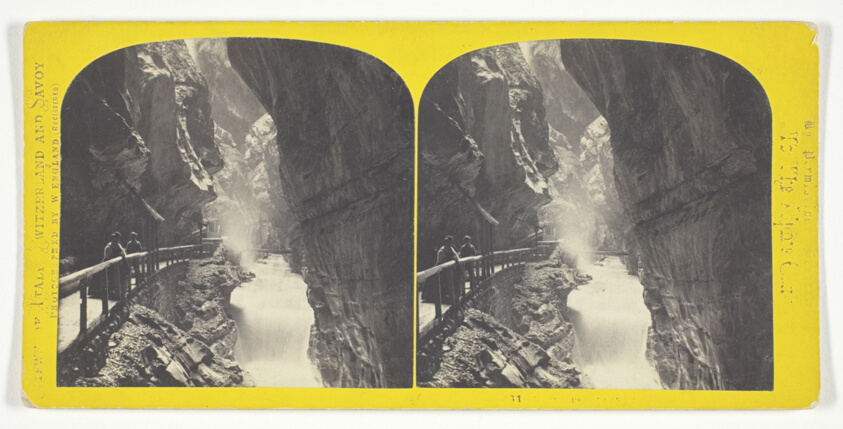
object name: Photograph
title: Unknown, from the series "Views of Switzerland"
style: 19th century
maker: William England (English, 1816-1896)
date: 1850/96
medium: Albumen print, stereo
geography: Switzerland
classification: photography; photograph; albumen silver print; stereograph (albumen)